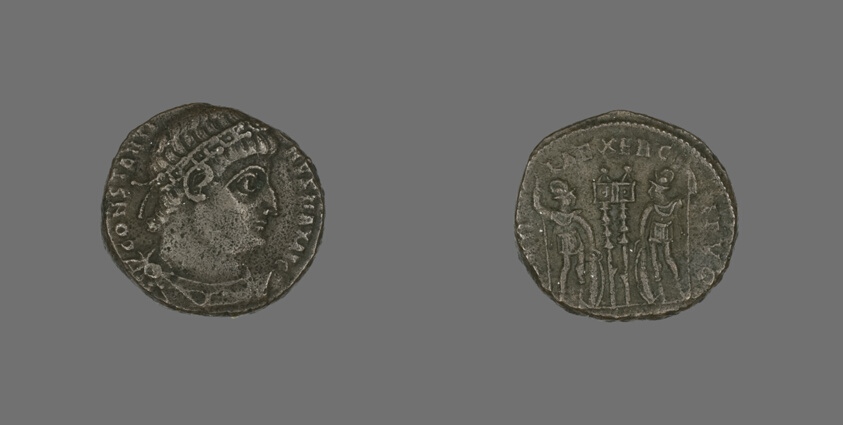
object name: Coin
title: Coin Portraying Emperor Constantine I or Emperor Constantine II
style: roman (ancient, style or period), ancient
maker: Roman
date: 307-337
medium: Bronze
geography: Roman Empire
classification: coin; ancient art